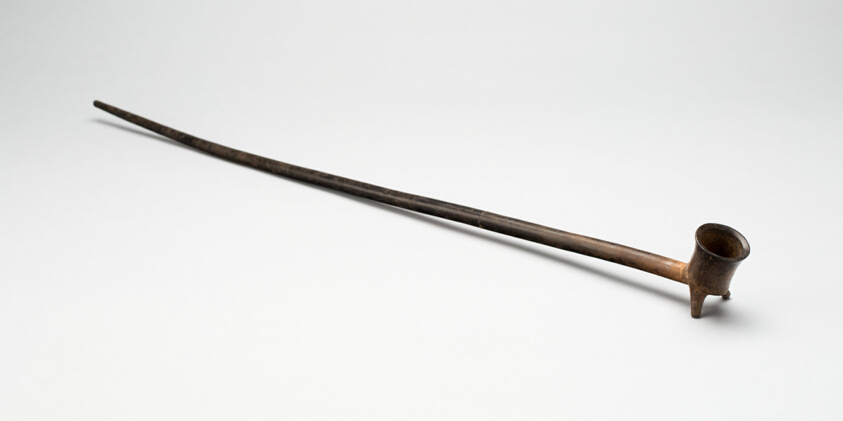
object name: Decorative Arts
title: Long-Stem Pipe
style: colima, mesoamerican, Pre-Columbian, americas, west mexico, Arts of the Americas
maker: Colima (Colima, Mexico)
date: c. 200 CE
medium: Ceramic and pigment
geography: Colima state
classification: earthenware; american decorative arts; ceramics; pipe; art of the americas; decorative arts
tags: smoke, pipes, ritual